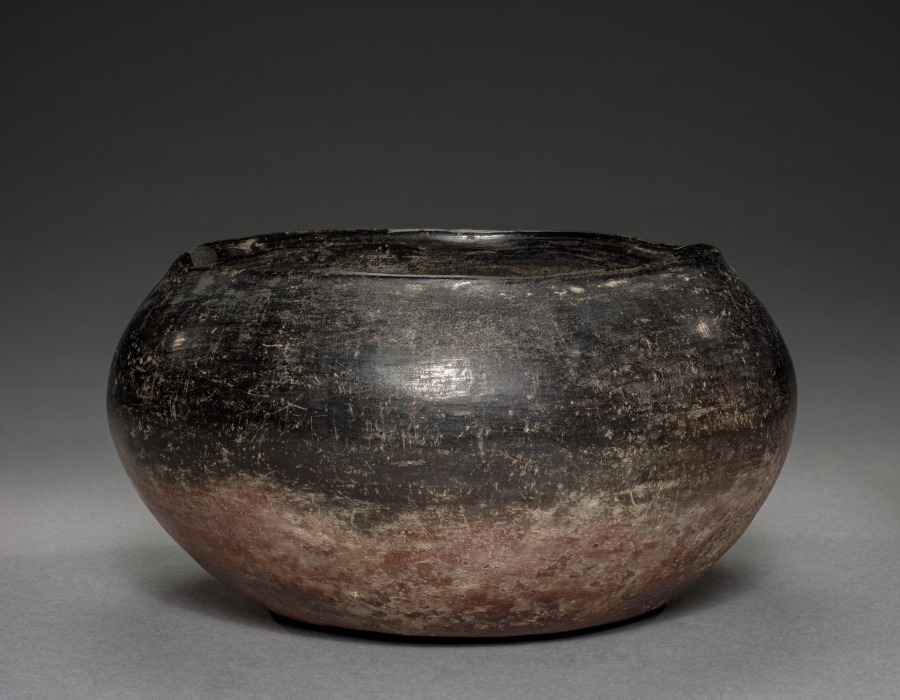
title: Black-Topped Bowl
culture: Egypt, Predynastic (5000–2950 BCE), Naqada II (3650–3300 BCE)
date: 4000–3000 BCE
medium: Nile silt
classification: Vessels